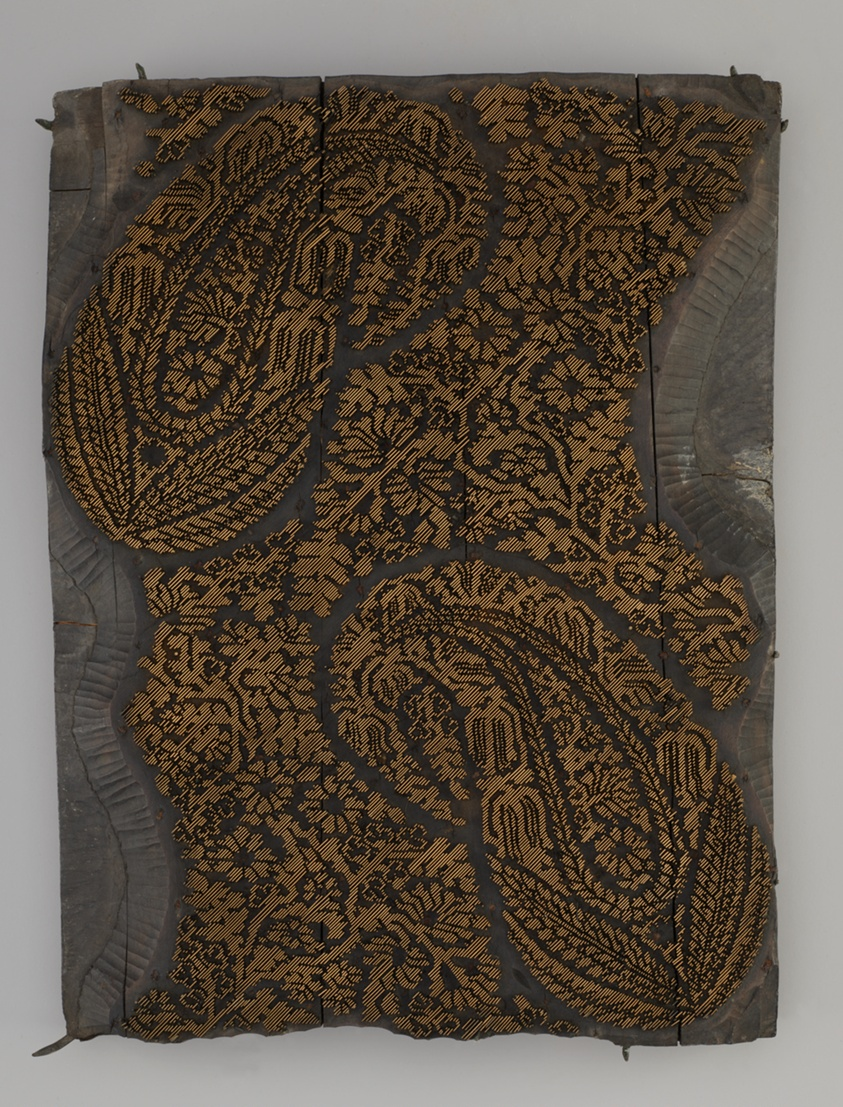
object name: Textile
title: Six Printing Blocks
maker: England or France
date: before 1850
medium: Carved wood, treated in a variety of techniques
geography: England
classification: printing blocks (printing surfaces); textile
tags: paisley